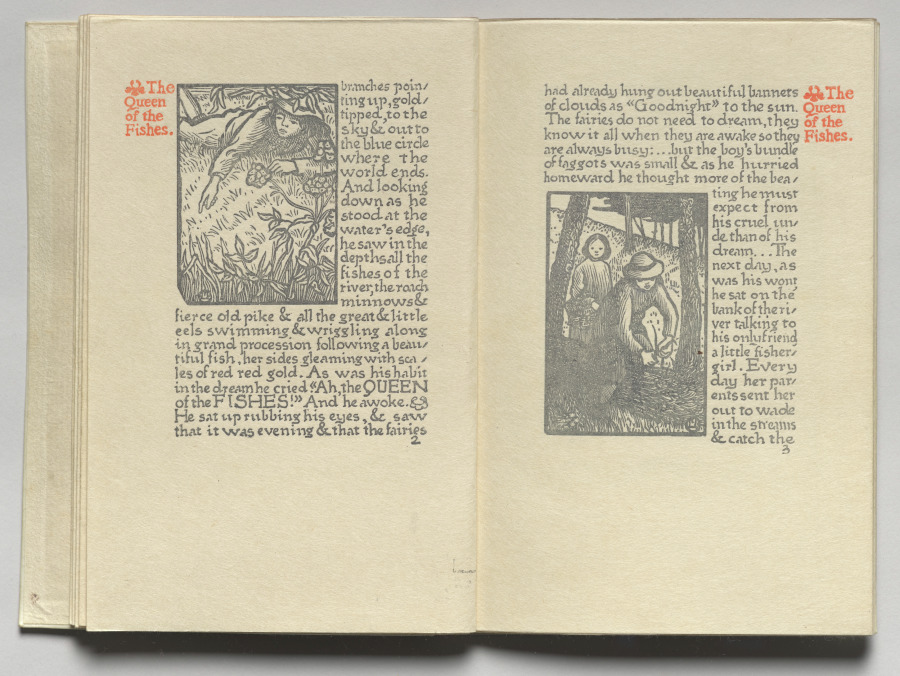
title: The Queen of the Fishes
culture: England, 19th century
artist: Lucien Pissarro (British, 1863–1944)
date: 1894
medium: Bound volume with color wood-engraved illustrations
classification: Bound Volume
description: “The Queen of the Fishes” is a French fairy tale about two mistreated children who turn into a fish and an oak tree. This edition was the first book published by the Eragny Press, the private firm of Lucien Pissarro, son of impressionist painter Camille Pissarro. Following the example of William Morris, Lucien wanted to return to the careful design and high-quality materials of early printed books. He and his wife, Esther Bensusan Pissarro, made this publication almost entirely by hand, including designing and engraving all the illustrations and ornaments.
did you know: Lucian Pissarro was a son of Impressionist painter Camille Pissarro.